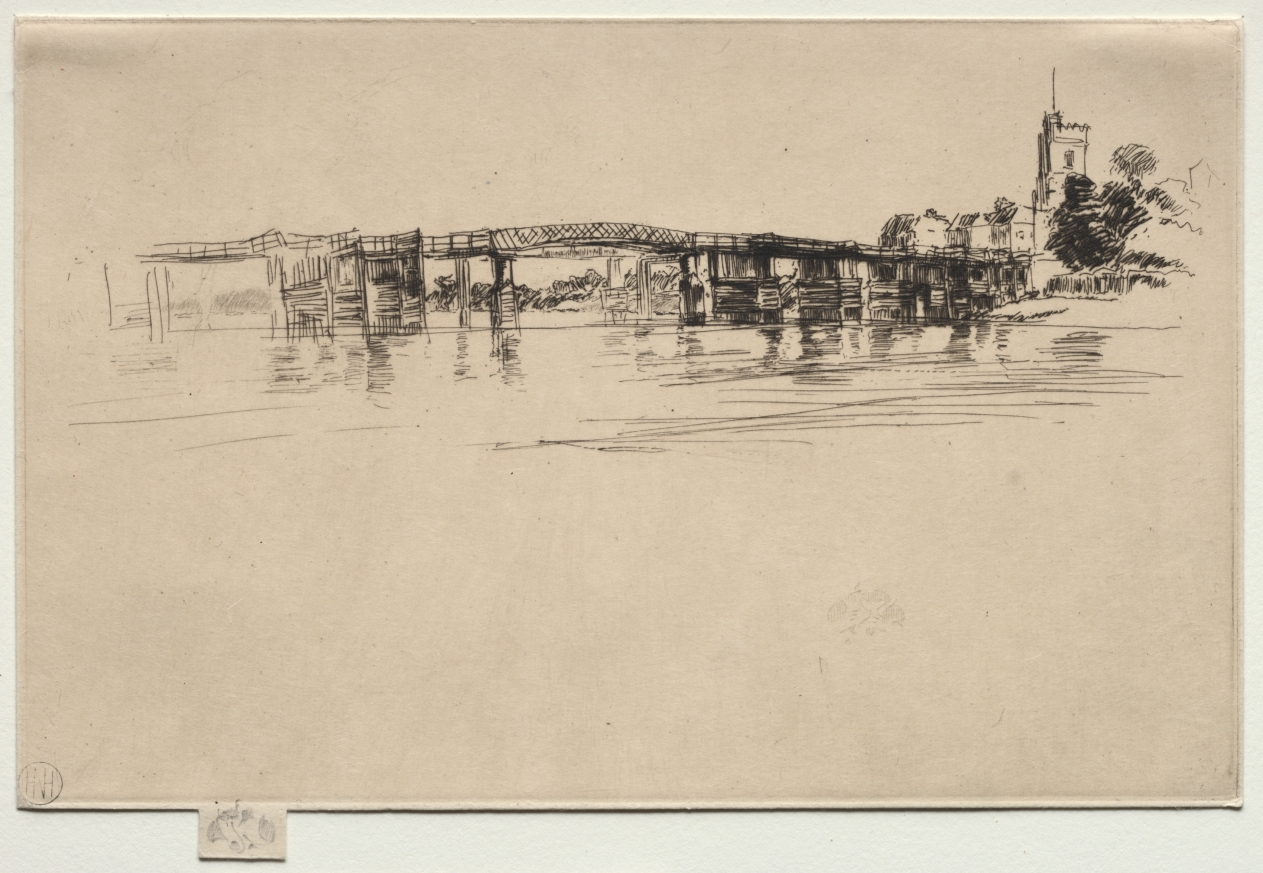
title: The Little Putney, No. 1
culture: America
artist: James McNeill Whistler (American, 1834–1903)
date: 1879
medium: etching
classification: Print